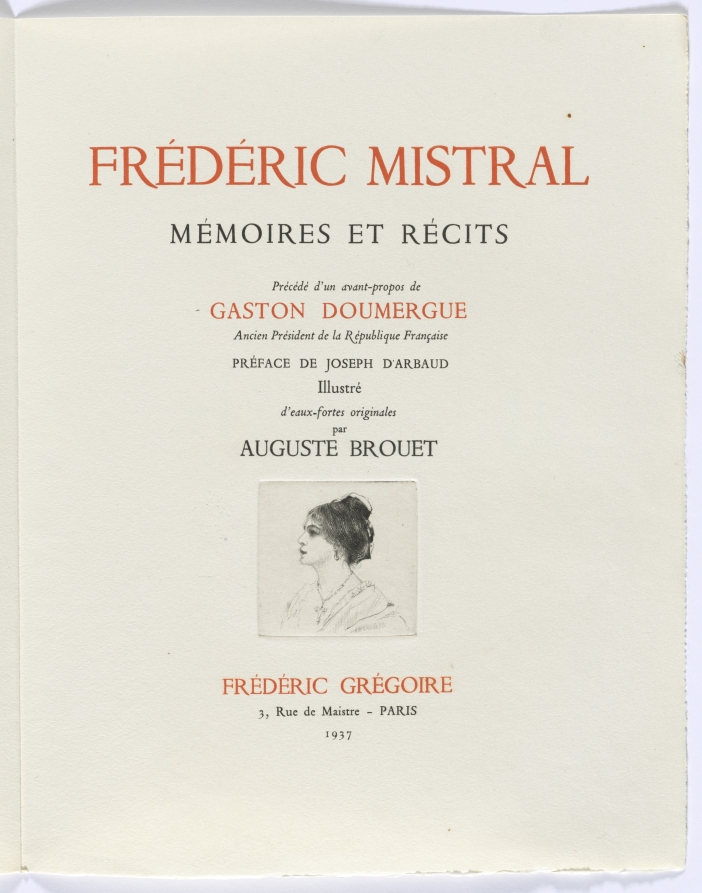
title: Frédéric Mistral: Mémoires et Recits by Frédéric Mistral: title page, bust of woman in profile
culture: France, 20th century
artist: Auguste Brouet (French, 1872–1941)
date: 1937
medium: etchings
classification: Portfolio